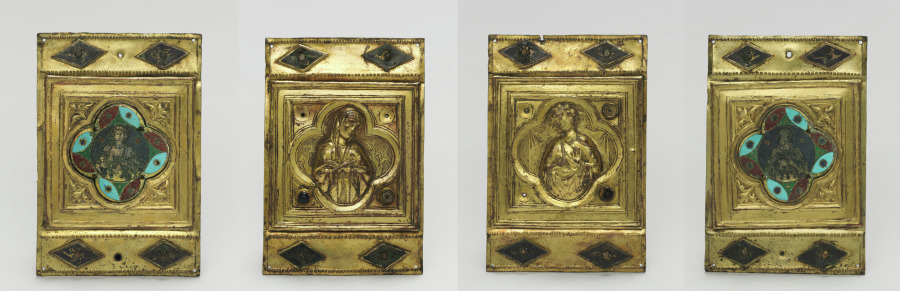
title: Set of Four Ornamental Plaques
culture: Italy, Tuscany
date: c. 1380–1400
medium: champlevé enamel, glass paste stones, and gilding on copper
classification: Enamel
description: These plaques appear to have been part of a larger ensemble forming a band of decoration affixed to a church altar. Each plaque is decorated in multiple techniques-embossing, engraving, enameling, and gilding-to create a sumptuous visual effect.